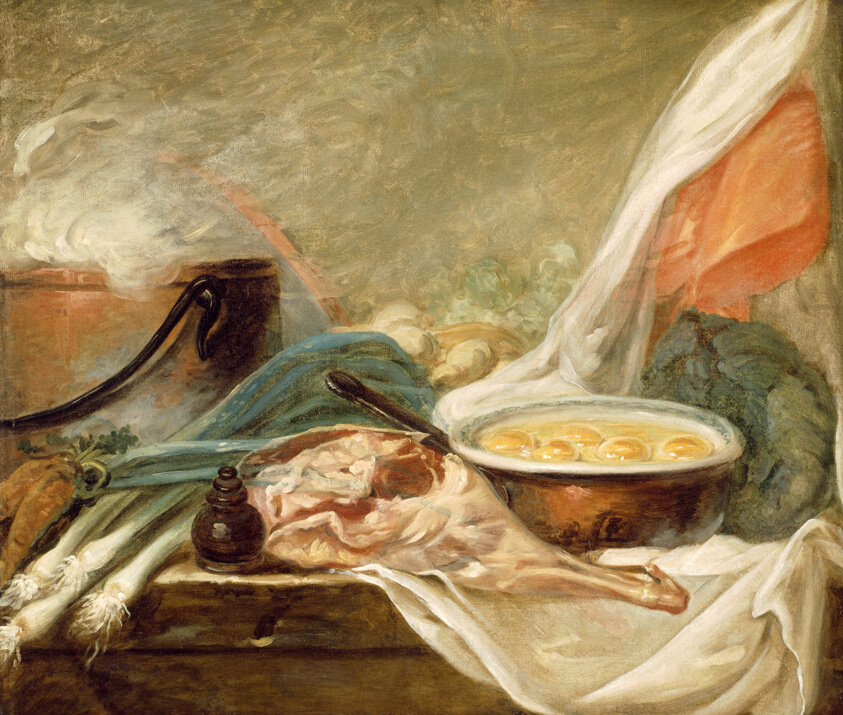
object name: Painting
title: Still Life with Eggs and a Leg of Mutton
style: 18th Century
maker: Artist unknown (French, active 18th century)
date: 1780/90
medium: Oil on canvas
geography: France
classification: oil on canvas; oil paintings (visual works); france; paint; french; painting; european painting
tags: Century of Progress, cloth, eggs, France, French, meat, pot, still life, vegetables, world's fairs, Chicago World's Fairs